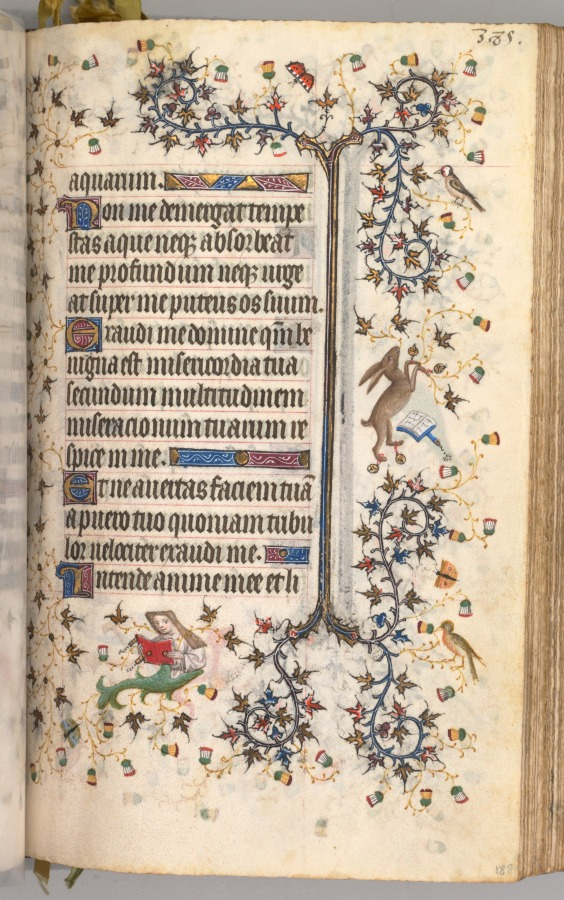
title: Hours of Charles the Noble, King of Navarre (1361-1425): fol. 188r, Text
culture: France, Paris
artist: Master of the Brussels Initials and Associates (French)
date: c. 1405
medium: ink, tempera, and gold on vellum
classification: Bound Volume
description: This precious volume was obviously highly prized by its owner, the French-born King of Navarre, who had his coat of arms painted on no less than twenty folios. Rather than directly commissioning this manuscript from a specific workshop, it seems that Charles the Noble acquired his book of hours -- perhaps ready-made for the luxury market -- while on a trip to Paris in 1404-05. A collaborative effort, six painting styles are evidenced within the pages of this codex, those of two Italians, two Frenchmen, and two Netherlanders. The painter who was responsible for the planning and decoration of the book, and who produced seventeen of the large miniatures, was a Bolognese artist known as the Master of the Brussels Initials. His principal assistant, responsible for most of the borders, was a Florentine who signed his name "Zecho" da Firenze on folio 208 verso.